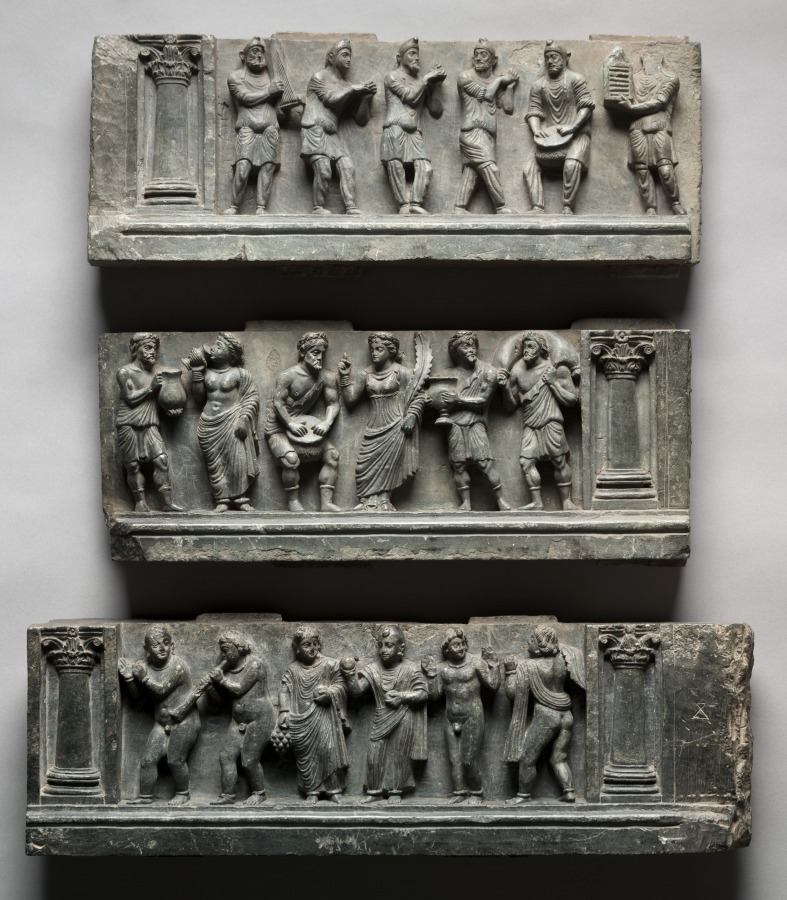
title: Foreigners and Non-Buddhists Drink, Dance, and Play Music, from a Buddhist Stupa Site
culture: Pakistan, Gandhara, Buner area, early Kushan period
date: c. 100 CE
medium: schist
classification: Sculpture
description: These three relief panels are from a group thought to have been used as ornamental stair risers at a Buddhist monument. They may have led up to a platform on which was established a stupa for veneration by followers of Buddhism. Phrygians with their trousers, tunics, and conical caps play music, dance, and clap, while Greek figures drink and carry wine. Naked figures and those wearing flowing robes and unusual hairstyles may be representatives of non-Buddhist sects, such as Jainism or the now defunct Ajivika religion. Bacchanalian scenes involving the ethnic and religious "other" were carved on the lower portions of public monuments in this multicultural region through which many international travelers passed during this time of heightened trade with the Mediterranean world.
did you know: Wine cups made of silver were also used as Buddhist reliquaries in this region.